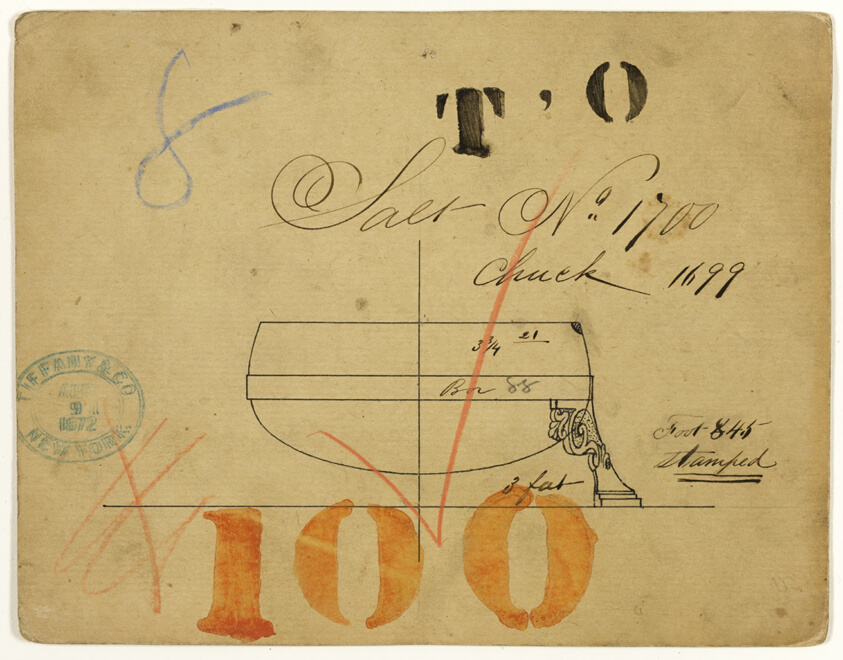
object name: Drawing and Watercolor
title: Design for Salt Dish No. 1700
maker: Tiffany and Company (American, founded 1837)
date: 1867/68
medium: Black ink on tan wove paper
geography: United States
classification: prints and drawing; paper